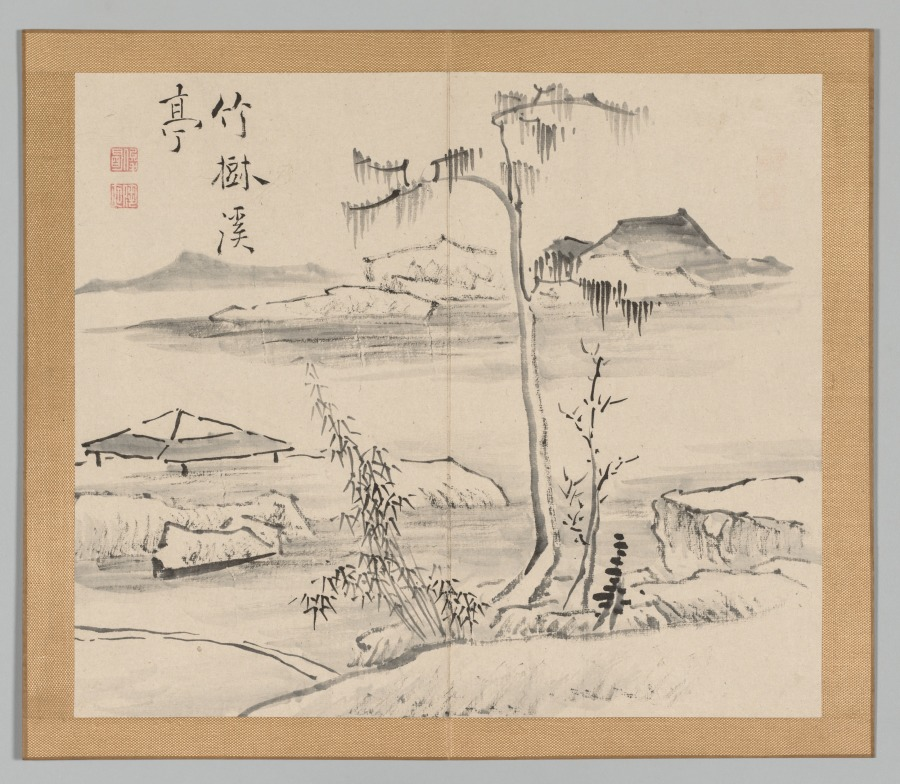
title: Reverberations of Taiga, Volume 2 (leaf 24)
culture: Japan, Edo period (1615–1868)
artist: Aoki Shukuya (Japanese, d. 1802)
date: mid- to late 1700s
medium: double-leaf from a pair of albums; ink and light color on paper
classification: Portfolio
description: Traditionally, young painters in Japan began their studies with an established master-painter. The master's compositions invariably became models that the apprentice copied to learn various ink and brush techniques. Shukuya was a pupil of the famous Kyoto artist Ikeno Taiga, whose style is reflected in these sketches of rocks, trees, and mountains.